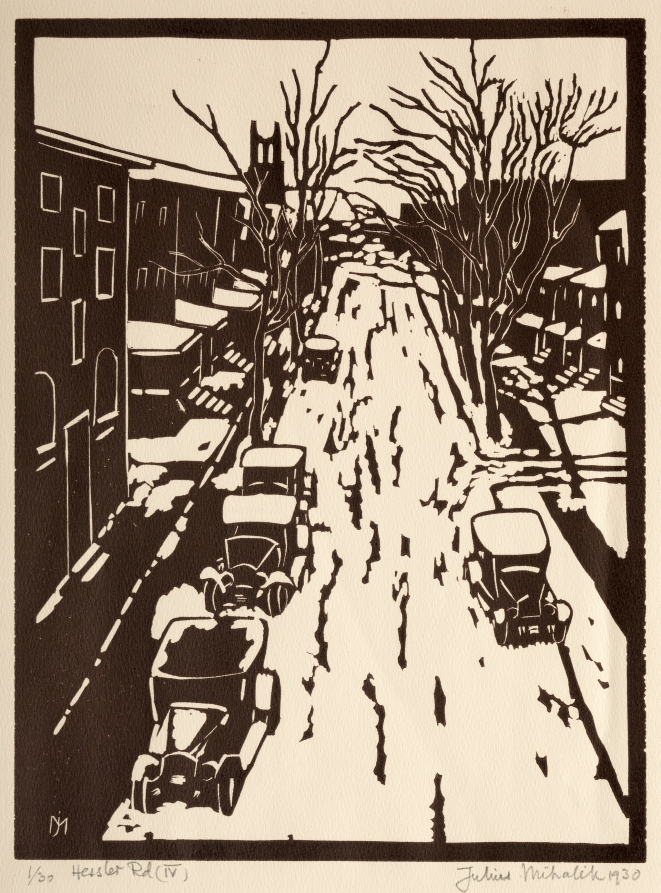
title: Hessler Road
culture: America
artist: Julius Mihalik (American, 1874–1943)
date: 1930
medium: linoleum cut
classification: Print